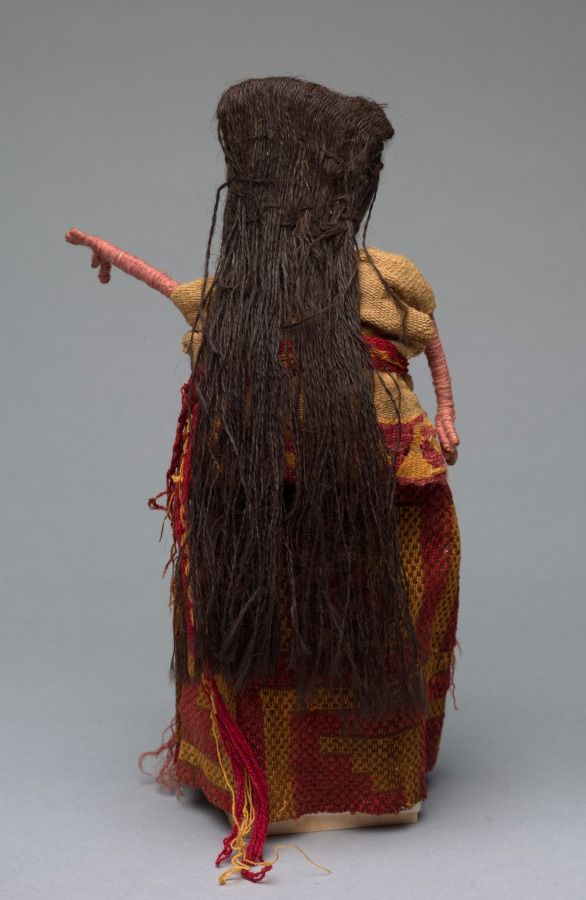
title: Male Figure with Modern Additions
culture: Peru, Central Coast, Chancay people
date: 1100–1500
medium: Original elements include the head and tunic; added elements include the skirt, red fringe, and belt; Cotton, camelid fiber, reeds; Slit tapestry (tunic and face); plain weave with supplementary weft (skirt)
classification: Miscellaneous